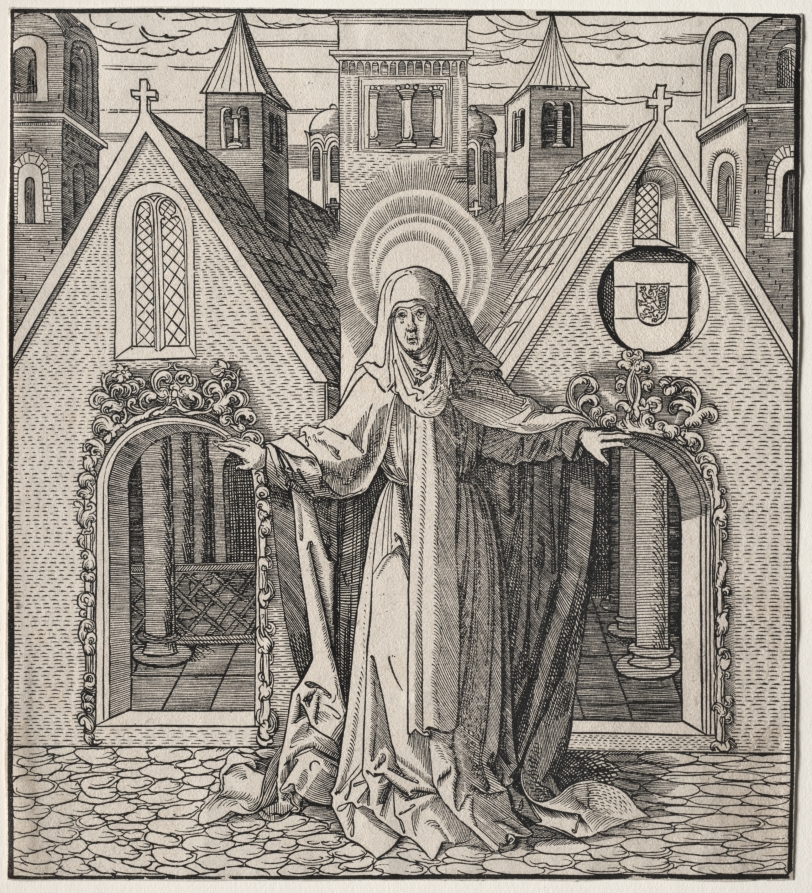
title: Sancta Rega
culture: Germany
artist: Leonhard Beck (German, c. 1480–1542)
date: 1512–1516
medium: woodcut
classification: Print